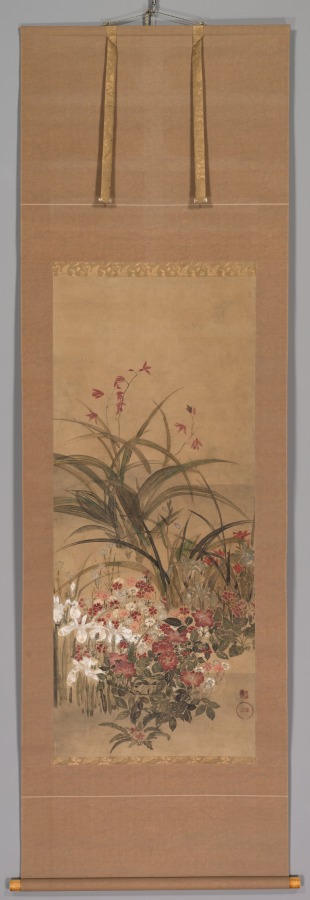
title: Summer Flowers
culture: Japan, Edo period (1615–1868)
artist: Kitagawa Sōsetsu (Japanese, active 1639–50)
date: mid-1600s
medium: hanging scroll; ink, color, and gold on paper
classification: Painting